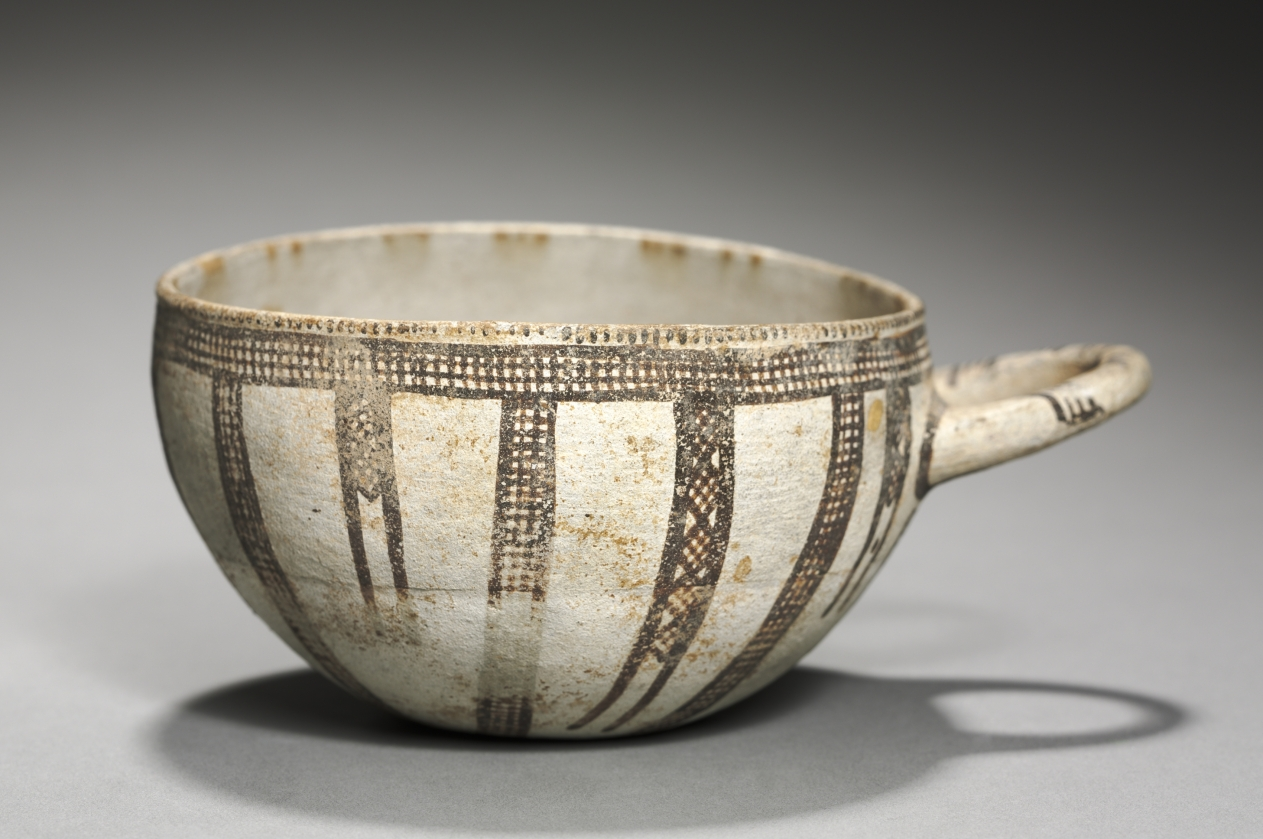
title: One-Handled Bowl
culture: Cyprus, late Cypriot II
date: c. 1450–1200 BCE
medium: white slip ware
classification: Ceramic